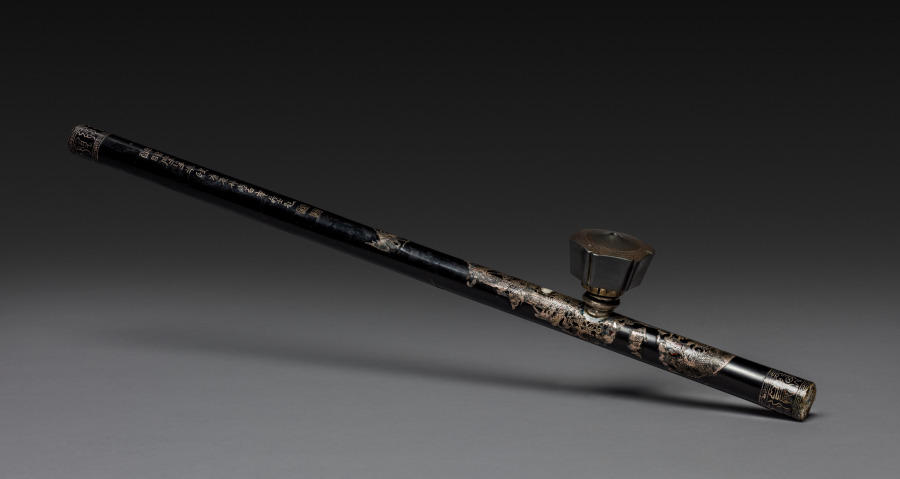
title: Opium Pipe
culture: China, Qing dynasty (1644-1911)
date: 1800s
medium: lacquer with silver decoration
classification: Miscellaneous